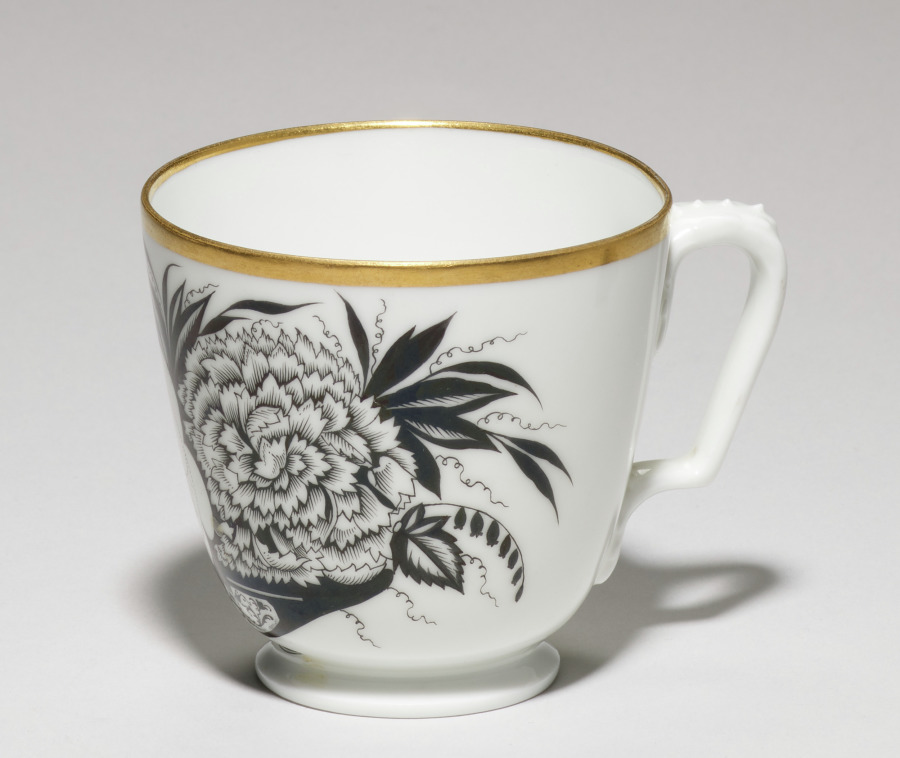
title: Cup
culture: Russia, St. Petersburg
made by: St. Petersburg Imperial Porcelain Factory (Russian)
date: 1881–1917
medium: porcelain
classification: Ceramic